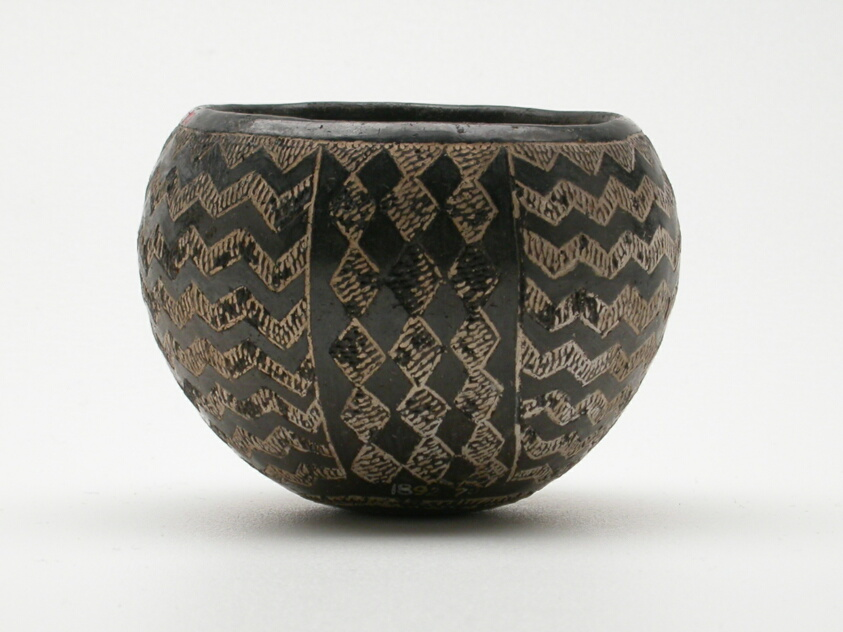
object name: Vessel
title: Bowl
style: predynastic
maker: Nubian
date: 2000-1750 BCE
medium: Ceramic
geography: Ancient Egypt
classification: bowl; ceramics; dish (vessel); vessel; ancient art